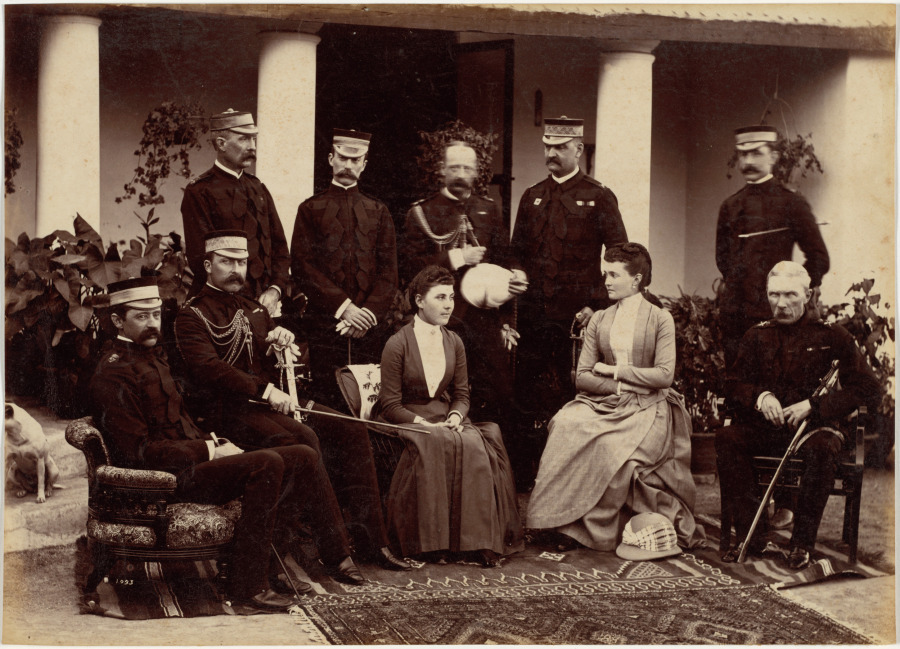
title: The Duke and Duchess of Connaught, with Col. Adam, Captain H.V. Benett, Col. Becher, Gen. Knowles, Captain Herbert, Col. Cavaye, Mrs. Cavaye, and Gen. R. Gellispie, Mhow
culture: India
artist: Raja Deen Dayal (Indian, 1844–1905)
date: 1887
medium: albumen print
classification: Photograph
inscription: Stamped in black ink on verso: “10.7B” Written in pencil on verso: “1093” Written in pencil on verso: “1093”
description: This gathering of British military officers was occasioned by the visit of Queen Victoria’s seventh child, Prince Arthur, Duke of Connaught and Strathearn (1850–1942) (seated, second from left). His wife, Princess Louise Margaret of Prussia, is the woman on the right. As commander in chief of the Bombay Presidency from 1886 to 1890, the prince performed military inspections and embarked on diplomatic missions throughout India. Dignitaries’ visits were routinely commemorated with a professional photograph. The photographer often took the image for free, counting on the purchase of prints by those wanting to feature the dignitary in their parlors on walls and tables or in albums.